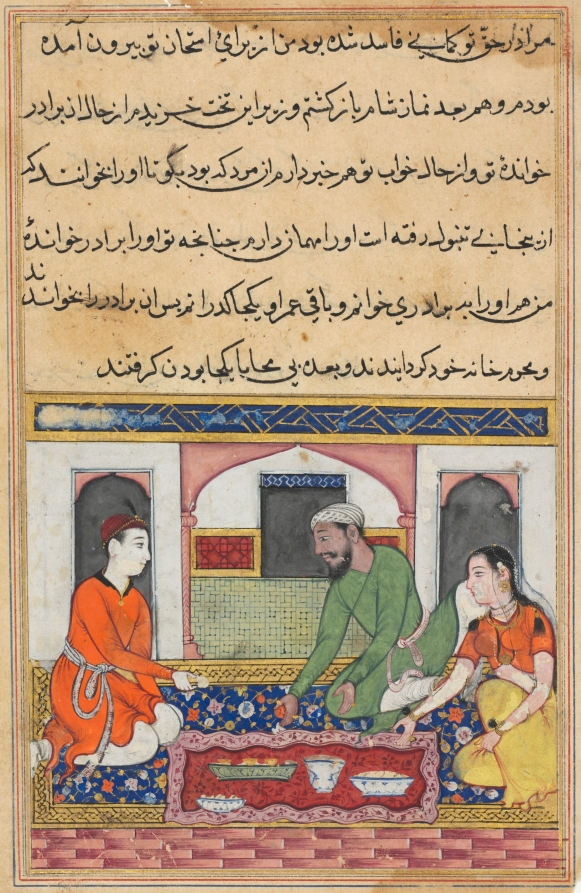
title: Shahr-Arai and her husband adopt her lover as a brother in the family, from a Tuti-nama (Tales of a Parrot): Fortieth Night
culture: Mughal India, court of Akbar (reigned 1556–1605)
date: c. 1560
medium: gum tempera, ink, and gold on paper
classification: Painting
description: Shahr-Arai and her husband sit together on the right, offering food to Shah-Arai’s lover. She has successfully tricked her gullible husband, and he gladly welcomes the young man into their household. From this point on, the three live happily together—the husband never uncovering the truth of Shah-Arai’s deception.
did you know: A lack of facial hair signals the lover’s youth.